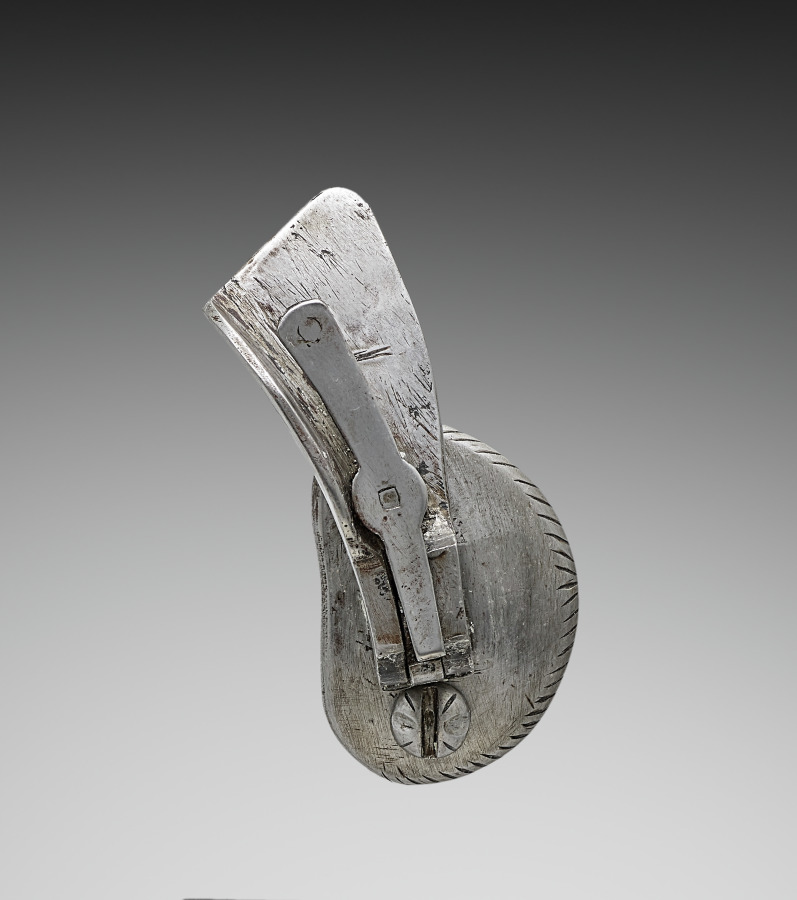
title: Lance Rest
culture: Germany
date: c.1550–1570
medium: iron, steel, leather and brass rivets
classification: Arms and Armor